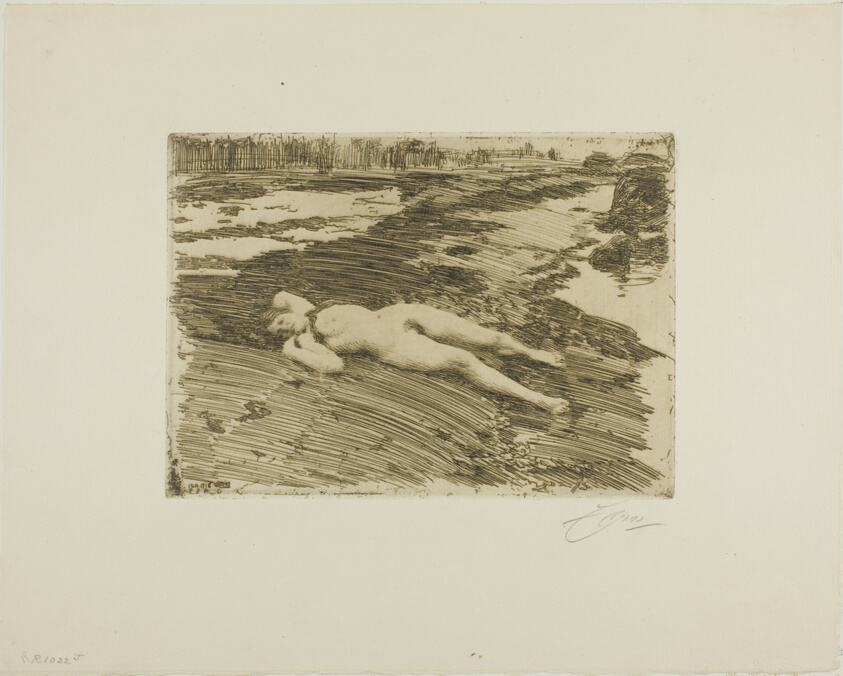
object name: Print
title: On the Sands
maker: Anders Zorn (Swedish, 1860-1920)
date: 1916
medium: Etching on cream laid paper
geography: Sweden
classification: etching; print; prints and drawing